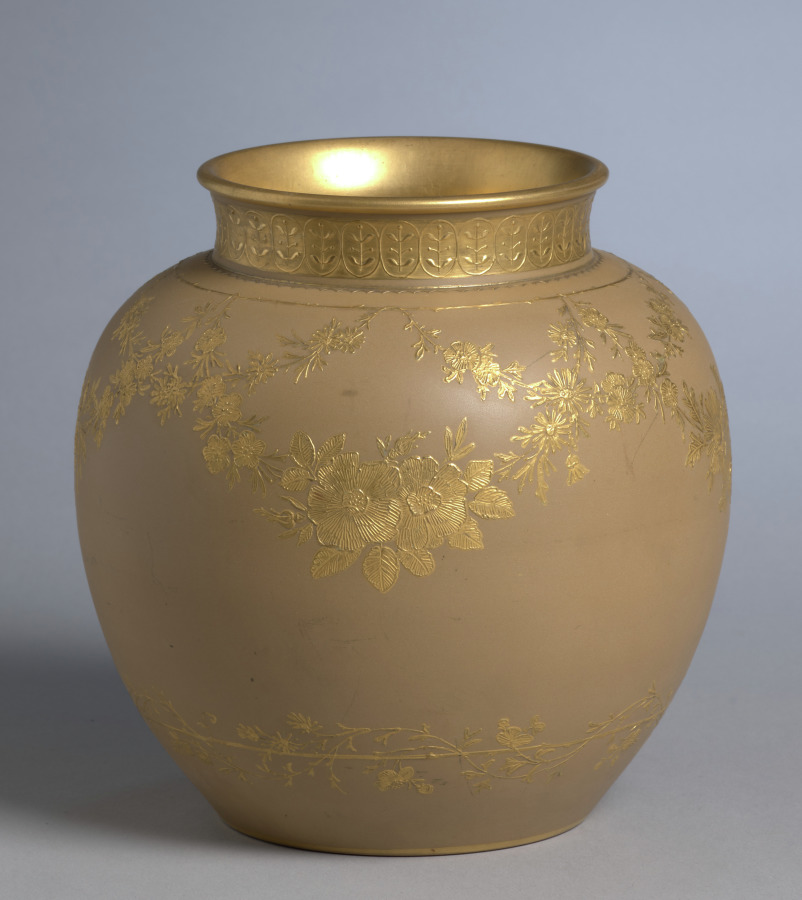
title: Vase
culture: England, late 19th Century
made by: Wedgwood Factory (British)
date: late 1800s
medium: ceramic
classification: Ceramic